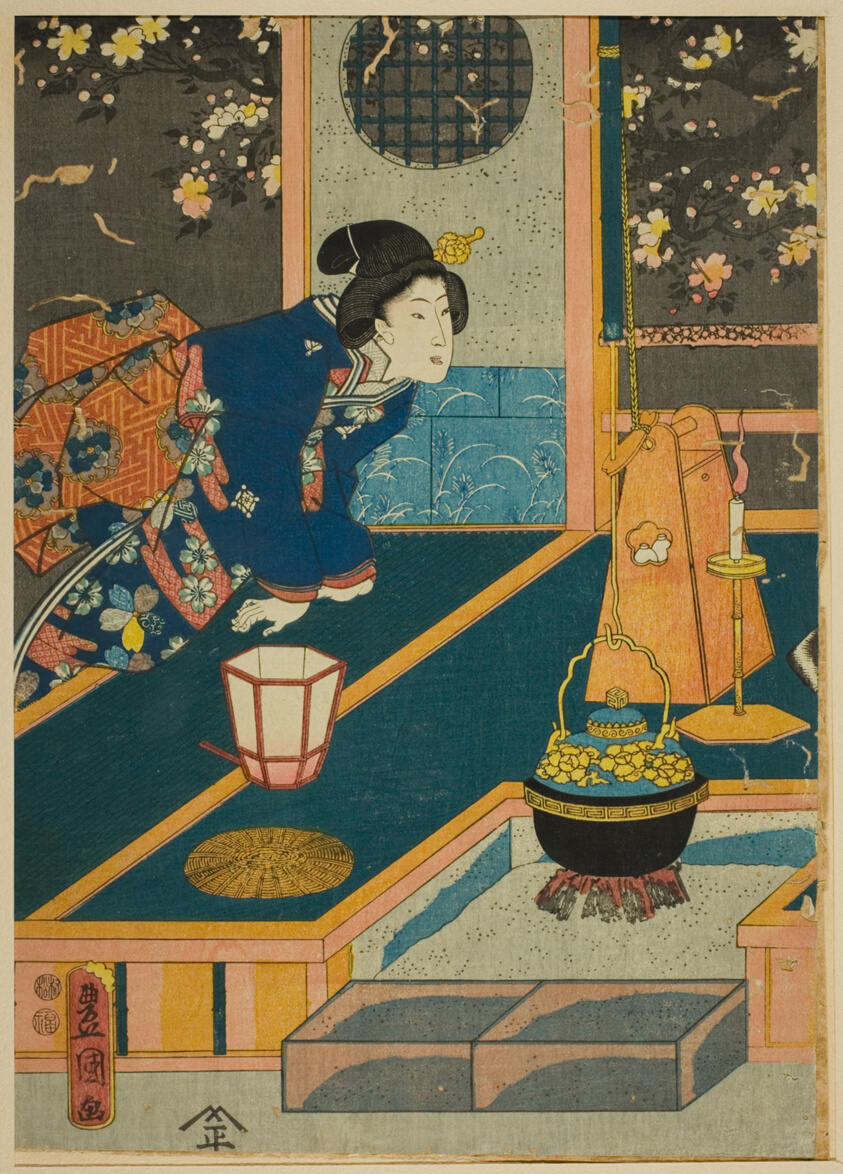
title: A Spring Night (Yayoi no yube)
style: edo (japanese period), Japanism, East Asian, asian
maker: Utagawa Kunisada I (Toyokuni III) (Japanese, 1786-1864)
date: c. 1847-52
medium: Color woodblock print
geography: Japan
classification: woodblock print; print; asian art